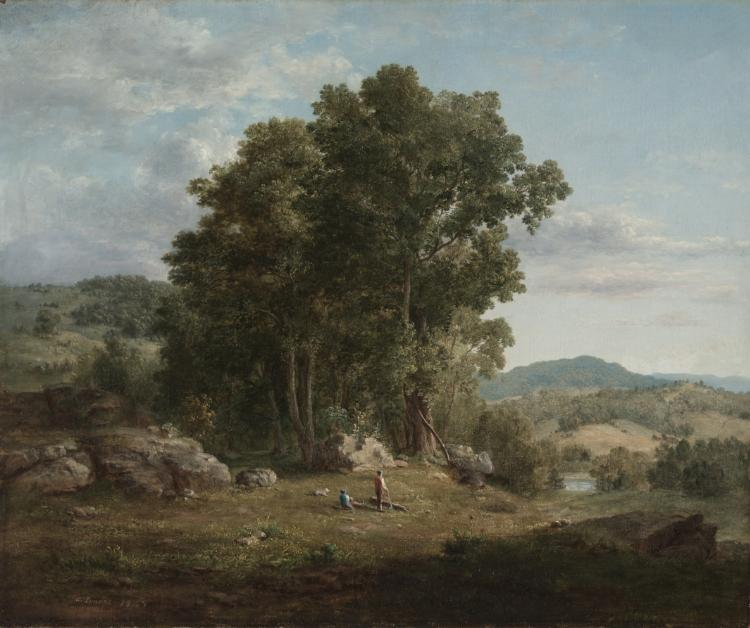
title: The Wood Chopper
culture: America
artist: George Inness (American, 1825–1894)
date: 1849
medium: oil on canvas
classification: Painting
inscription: Signed lower left: "G. Inness 1849"